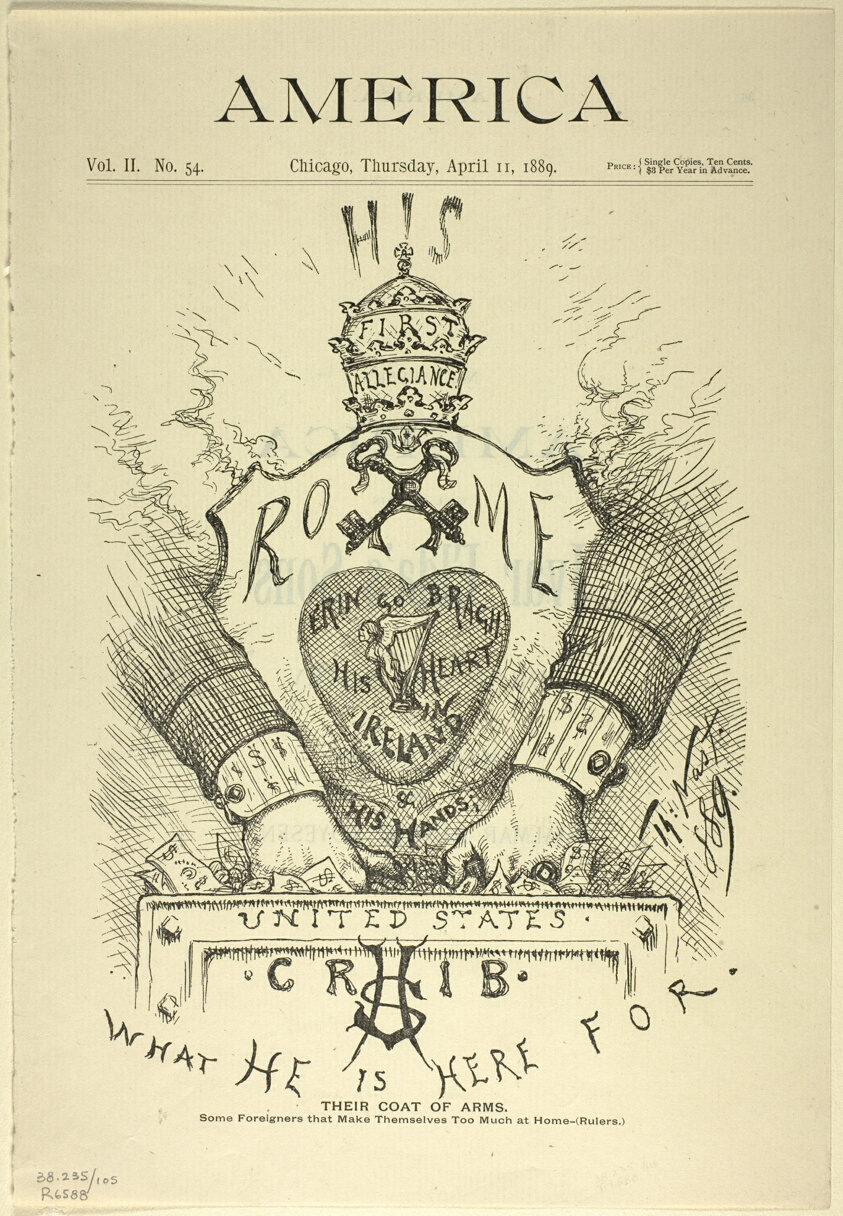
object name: Print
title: Their Coat of Arms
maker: Thomas Nast (American, 1840-1902)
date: published April 11, 1889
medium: Lithograph on newsprint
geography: United States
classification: lithograph; print; prints and drawing